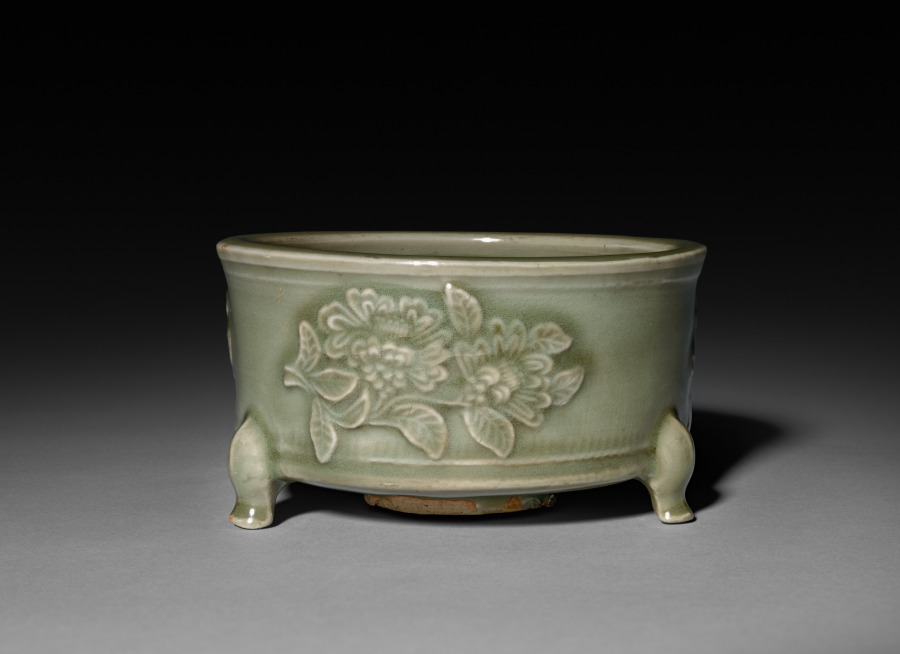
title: Incense Burner in Form of Archaic Lian with Peonies in Relief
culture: China, Zhejiang province, Yuan dynasty (1271-1368)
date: 1300s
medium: Glazed porcelain with molded decoration, Longquan ware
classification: Ceramic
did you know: In East Asian art, peonies traditionally symbolize prosperity and wealth.